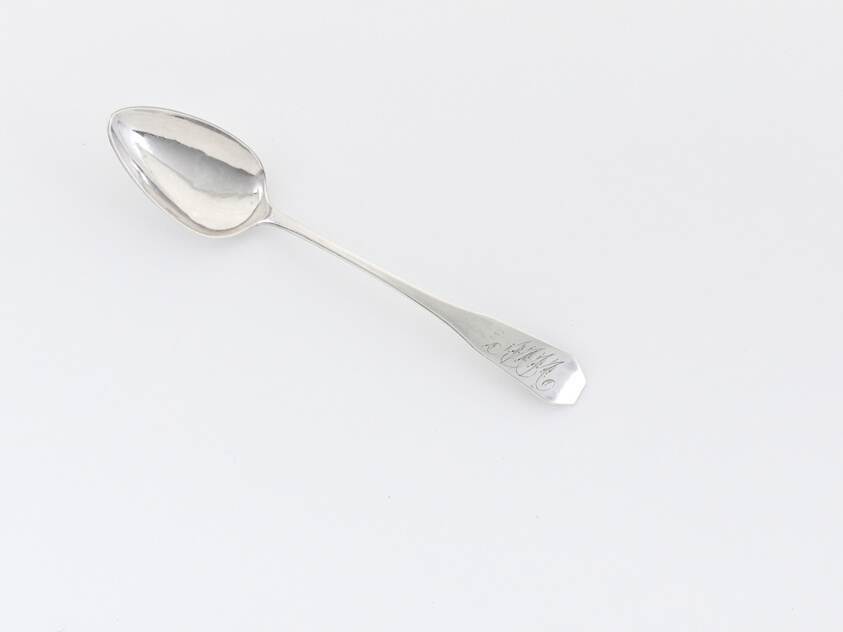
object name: Metalwork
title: Teaspoon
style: 19th century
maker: Isaac Hutton (American, 1767–1855); Albany, New York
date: c. 1805–15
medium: Silver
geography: Albany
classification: spoon; silver; utensil; american decorative arts; american arts; decorative arts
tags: dining, spoon